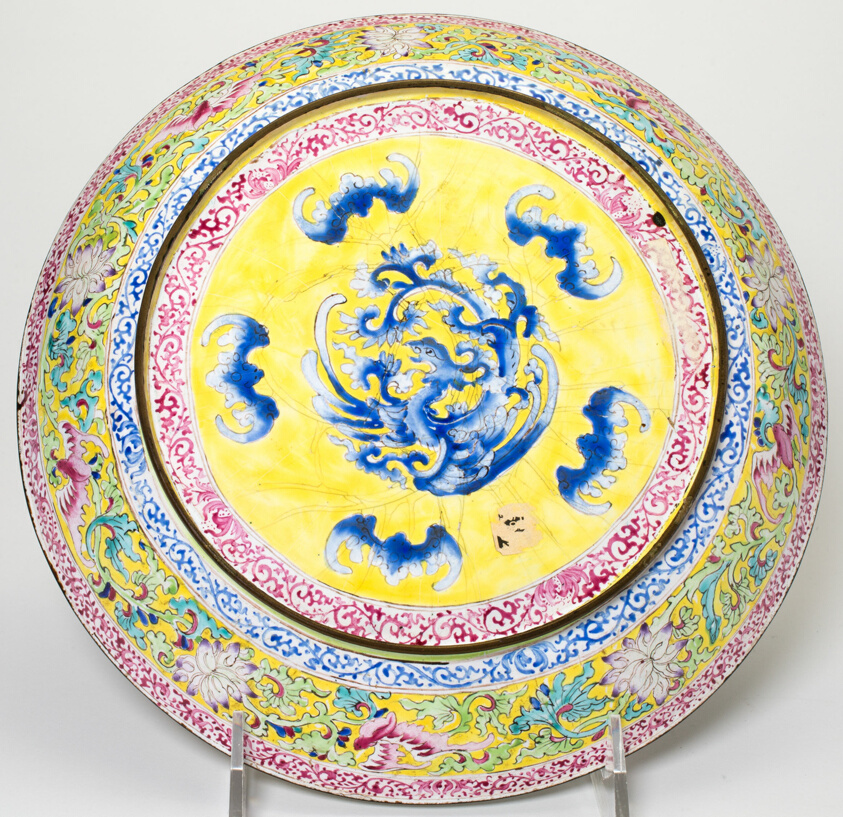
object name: Vessel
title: Dish with Butterflies and Flowers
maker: China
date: Qing Dynasty (1644–1911), Qianlong period (1736–1796)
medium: Famille-rose enamel on copper or brass base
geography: China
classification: ceramics; asian art